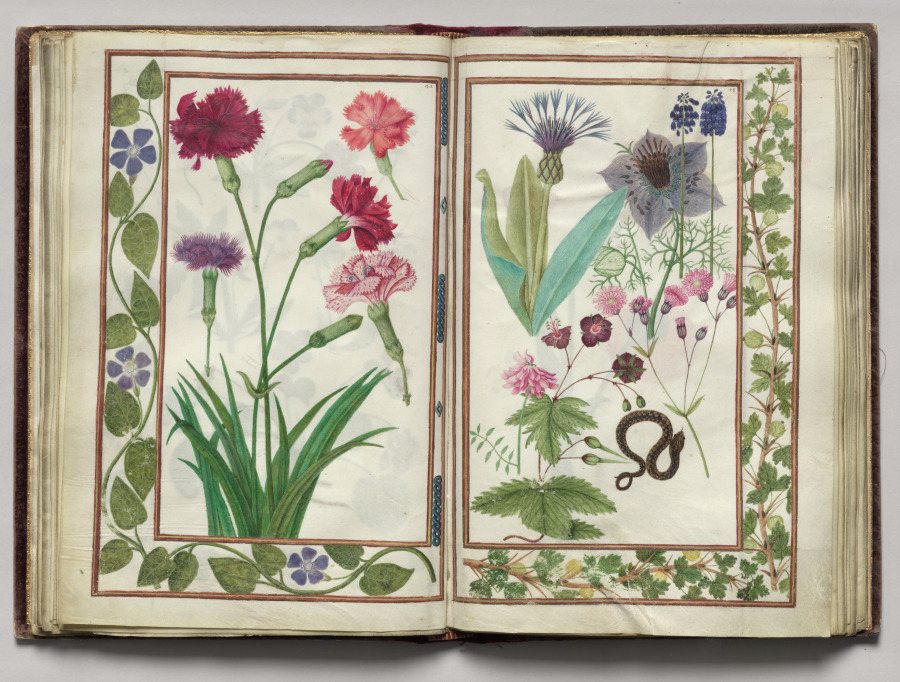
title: Dianthus with Periwinkle Border, folio 21 (verso), from Florilegium (A Book of Flower Studies)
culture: France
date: 1608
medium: watercolor, ink, silver, and gold over occasional traces of pencil, on vellum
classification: Bound Volume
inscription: Dated: Poitiers 1608 (on frontispiece) Signed: On frontispiece in black ink, lower right: Van Kuyk Notation on drawing: Frontispiece: in pencil, lower margin: * élève de Van Kessel, peintre flammand (* in pencil also appears in front of Van Kuyk's name).